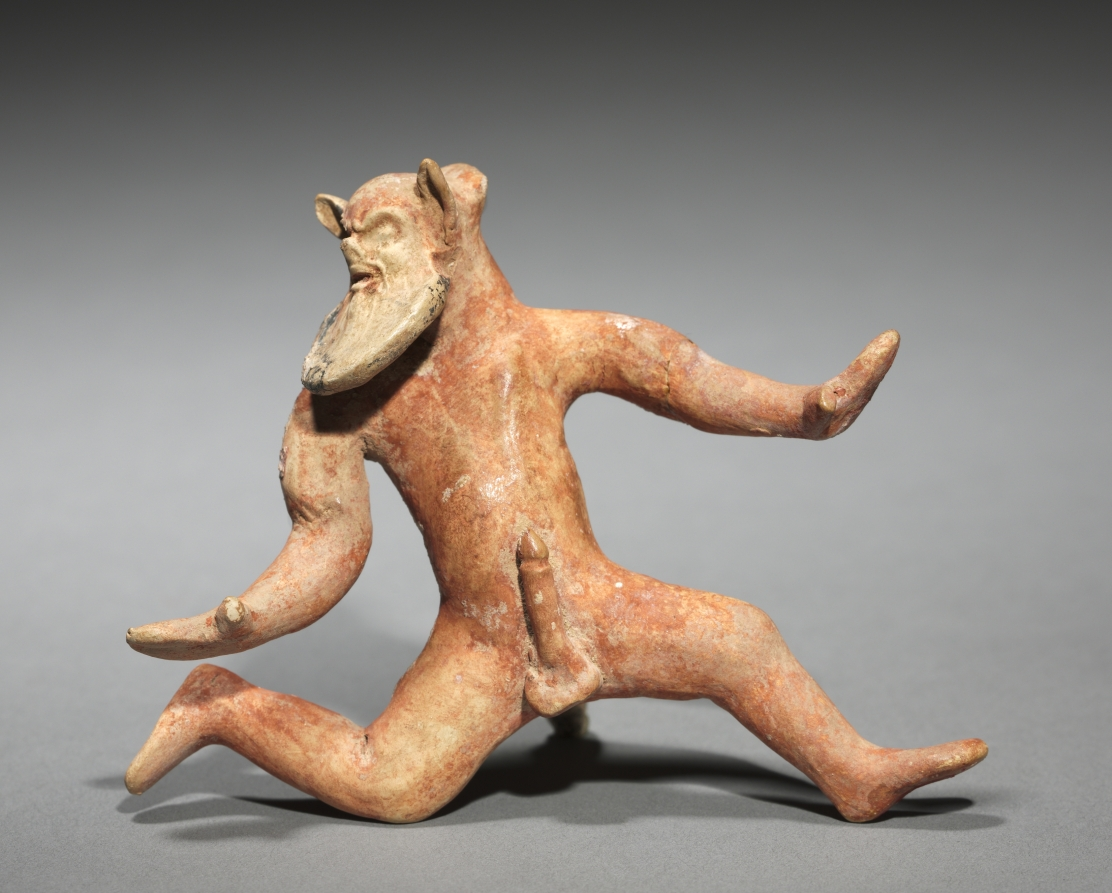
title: Dancing Satyr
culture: Greece, Boeotia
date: 500–475 BCE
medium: painted terracotta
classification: Sculpture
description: Part man and part beast, satyrs were mythical woodland creatures. In art, they were depicted with the ears and tail of a goat or horse, sometimes with hooves, and in a high state of sexual arousal. Satyrs often accompanied Dionysus, the god of wine, in his drinking bouts and other escapades. These three probably once decorated the rim of a large punch-bowl-shaped vessel for serving wine.